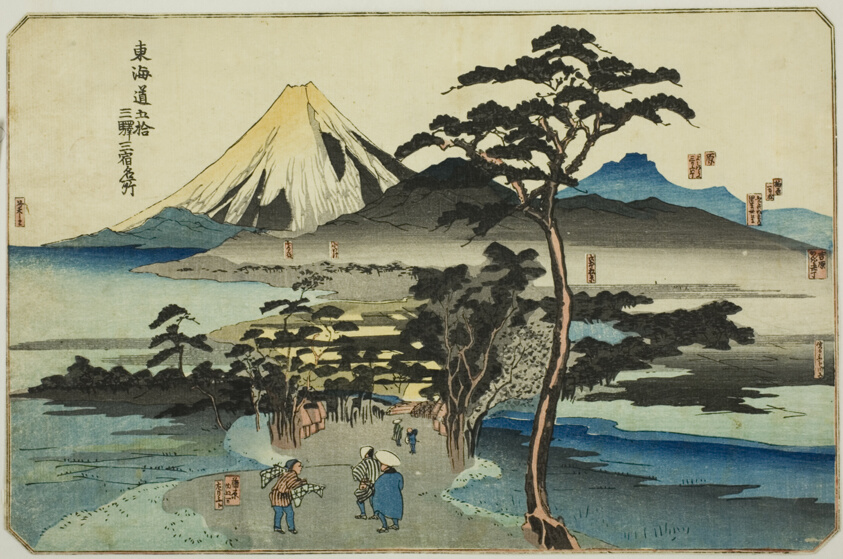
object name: Print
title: Hara, Yoshiwara, and Kanbara, from the series "Famous Places on the Fifty-three Stations of the Tokaido, Three Stations (Tokaido gojusan eki sanshuku meisho)"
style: Japanese (culture or style)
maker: Utagawa Kuniyoshi (Japanese, 1797-1861)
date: c. 1830/35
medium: Color woodblock print; oban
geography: Japan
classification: woodblock print; print; asian art